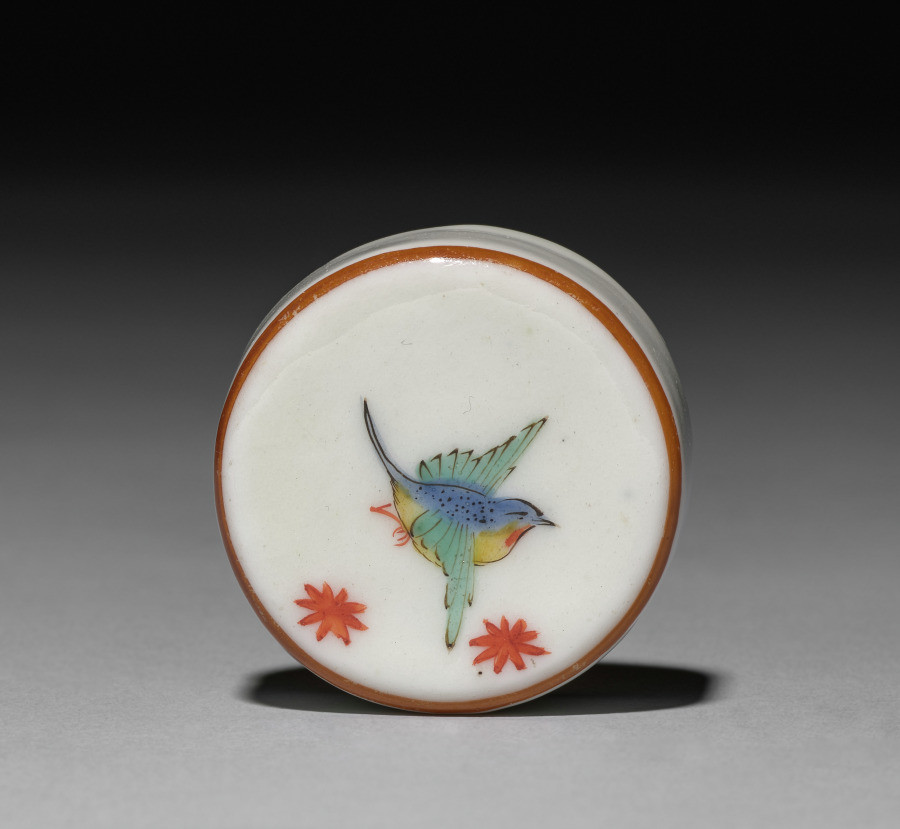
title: Tea Caddy (lid)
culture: Germany, Meissen, 18th century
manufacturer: Meissen Porcelain Factory (German, est. c. 1710)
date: c. 1735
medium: porcelain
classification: Ceramic